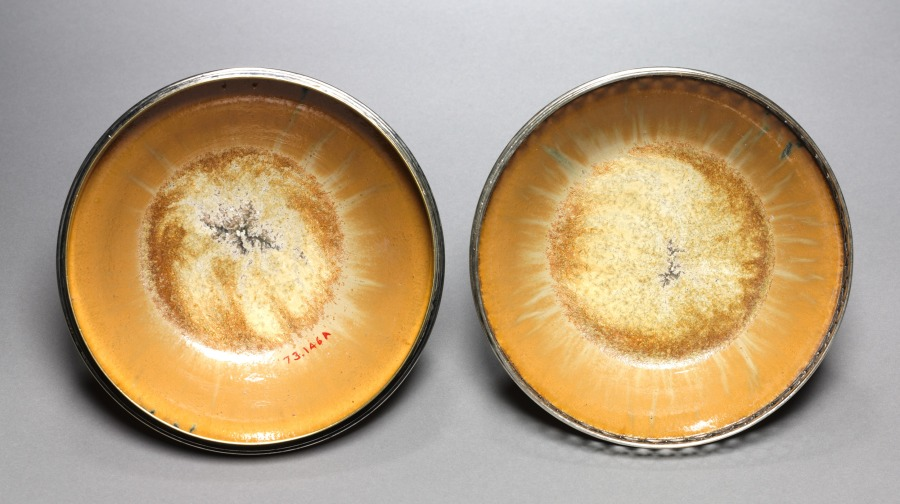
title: Covered Bowl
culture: France, late 19th-early 20th Century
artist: Auguste Delaherche (French, 1857–1940)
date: c. 1899–1900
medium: stoneware with metal mounts, silvered and gilded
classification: Ceramic